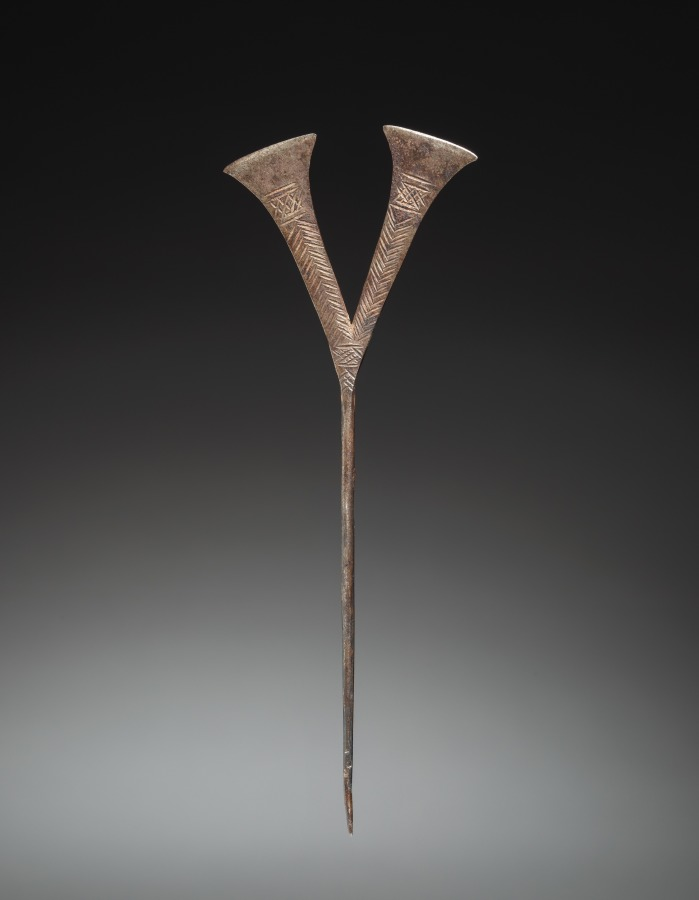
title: Hair Ornament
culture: Africa, Central Africa, Democratic Republic of Congo, Luba-style maker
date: Unassigned, before 1915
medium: Iron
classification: Jewelry